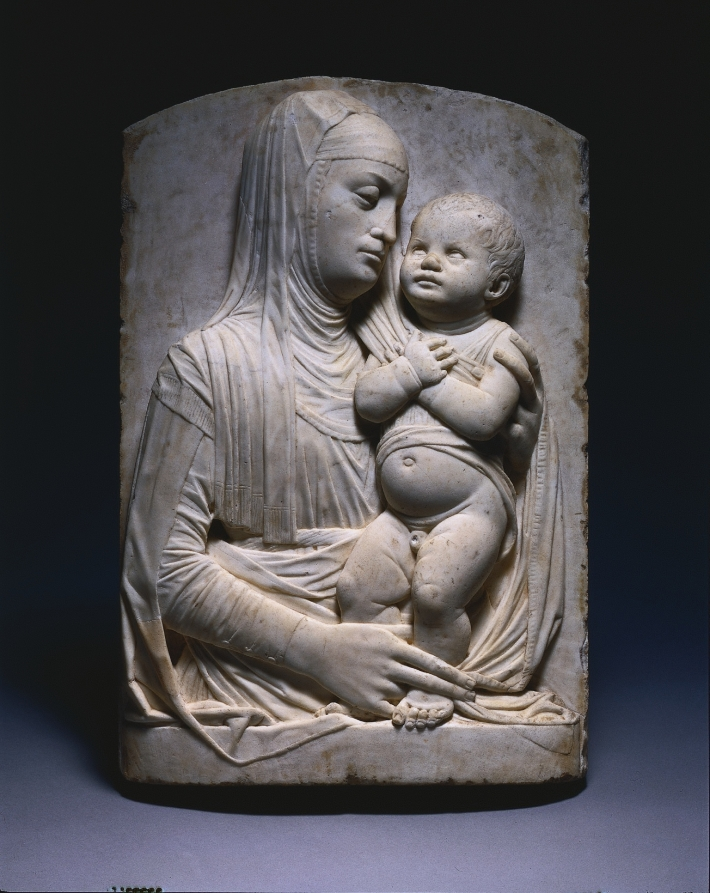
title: Virgin and Child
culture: Italy, Venice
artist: workshop of Pietro Lombardo (Italian, c. 1435–1515)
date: c. 1475–1485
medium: marble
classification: Sculpture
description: In the later 1400s, artists increasingly infused sacred subject matter with a classical vocabulary. The shallow relief and simplified forms ultimately stemmed from ancient sculpture, bringing gravity as well as novelty to a conventional theme. Yet naturalistic elements such as the baby’s bulging navel, chubby wrists, and shirt pulled up to reveal his genitals all humanize Christ, a critical principle of Christian dogma.